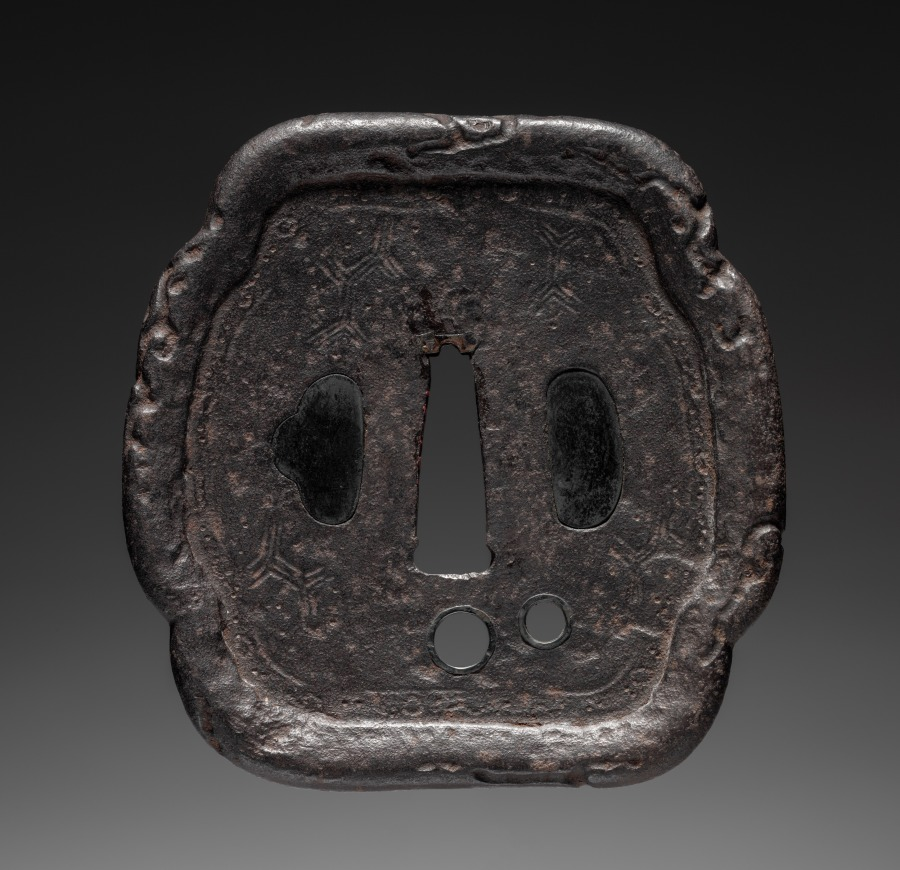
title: Sword Guard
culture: Japan, Muromachi period (1392–1573) to Momoyama period (1573–1615)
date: 1500s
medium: iron (Myochin type)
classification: Arms and Armor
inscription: signed "Nobuiye."